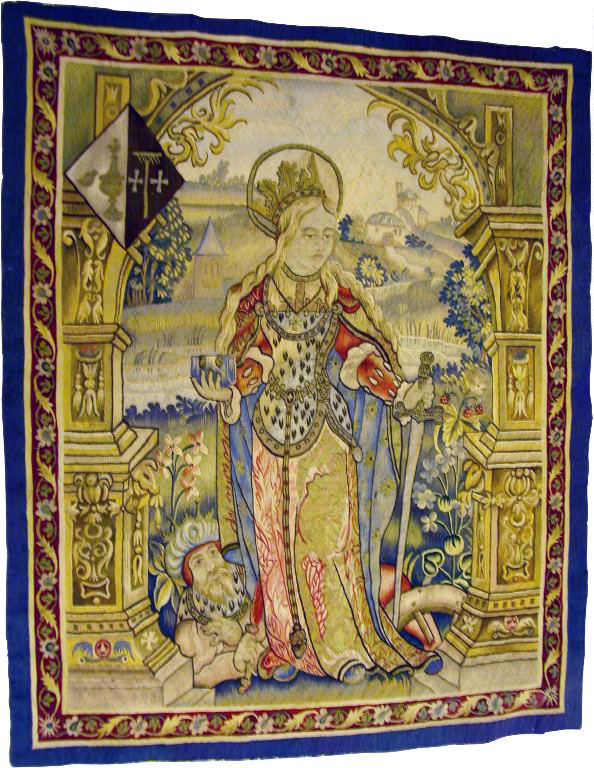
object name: Textile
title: Hanging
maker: Europe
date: 19th century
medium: Wool and gold metal thread, tapestry weave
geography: Europe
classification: weaving - tapestry; textile